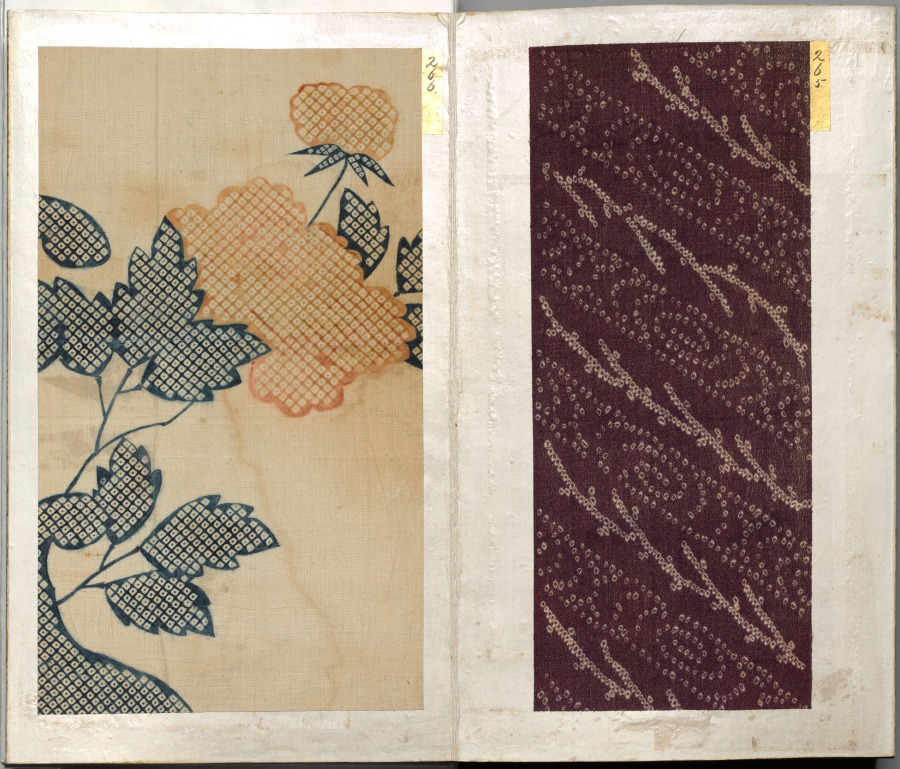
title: Album of Textile Samples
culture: Japan, Edo period (1615–1868)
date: 1600s-1700s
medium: silk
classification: Textile